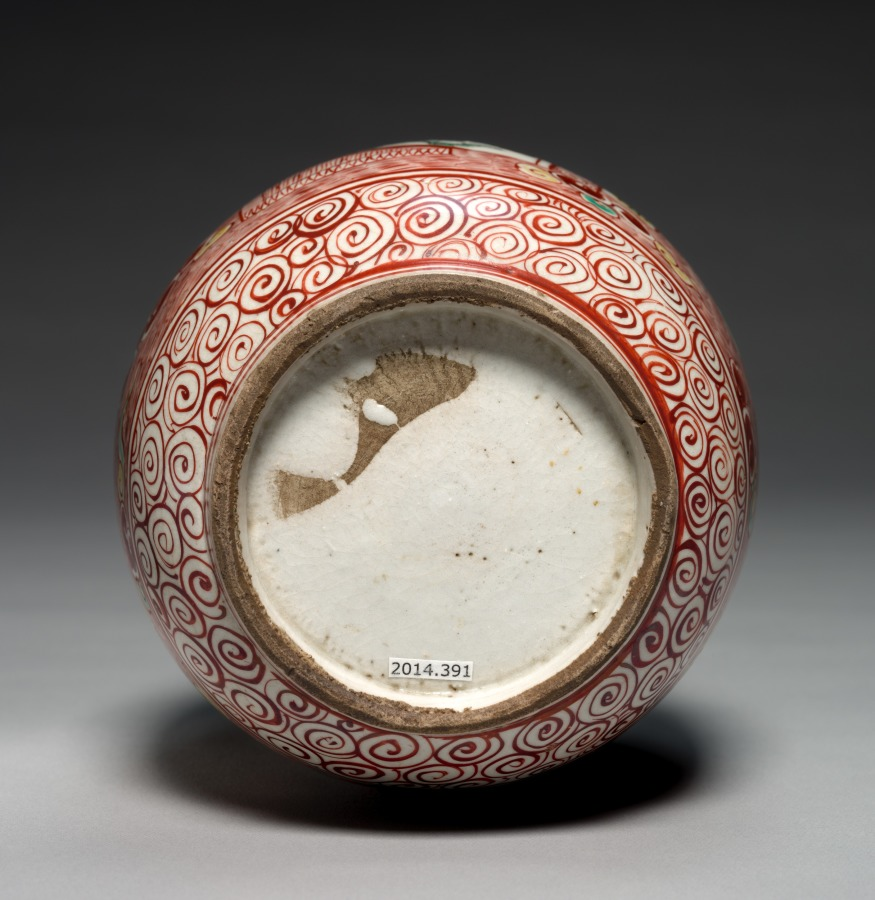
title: Tea Whisk-Shaped Sake Bottle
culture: Japan, Edo period (1615–1868)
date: 1660s–early 1670s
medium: Porcelain with overglaze enamel (Hizen ware, early iro-e)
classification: Ceramic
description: This sake bottle resembles a whisk used in preparing powdered green tea, with the handle at the top and the body of the brush flaring out below. Its bold design is anchored by images of chrysanthemums and pomegranates set in panels against a ground of red hatching with tricolored clouds. Additional patterns of swirls, stripes, flowers, and other forms make the piece dazzling.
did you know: This bottle is for sake, or fermented rice wine, Japan's most famous variety of local alcohol.